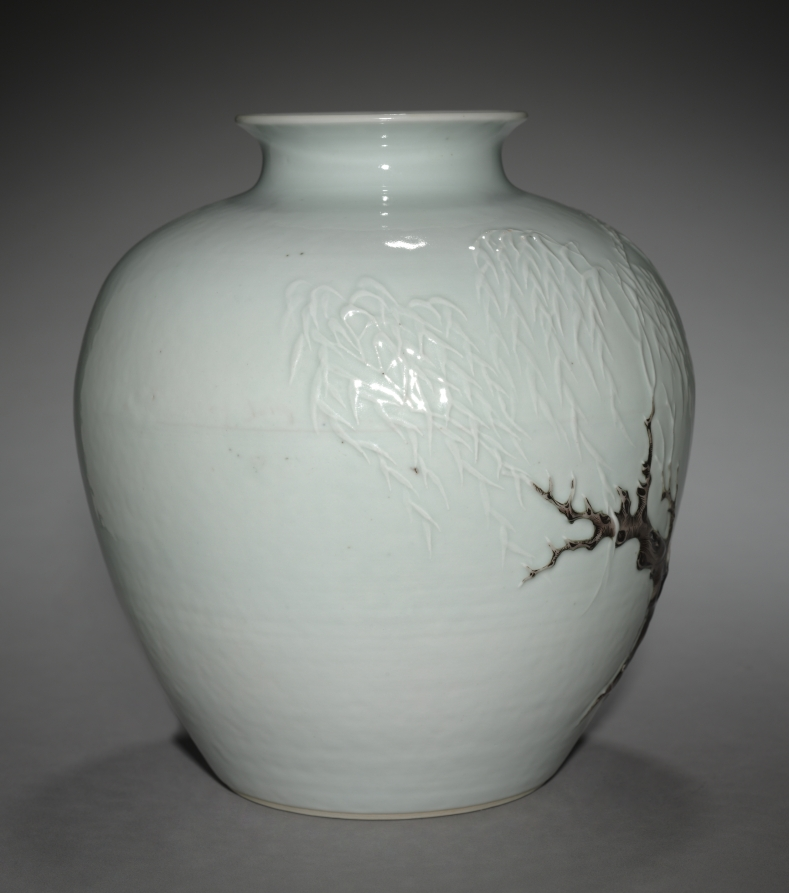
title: Jar with Crane and Willow in Relief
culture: China, Jiangxi Province, Jingdezhen kilns, Qing dynasty (1644–1911)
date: 1700s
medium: porcelain with raised and overglaze enamel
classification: Ceramic